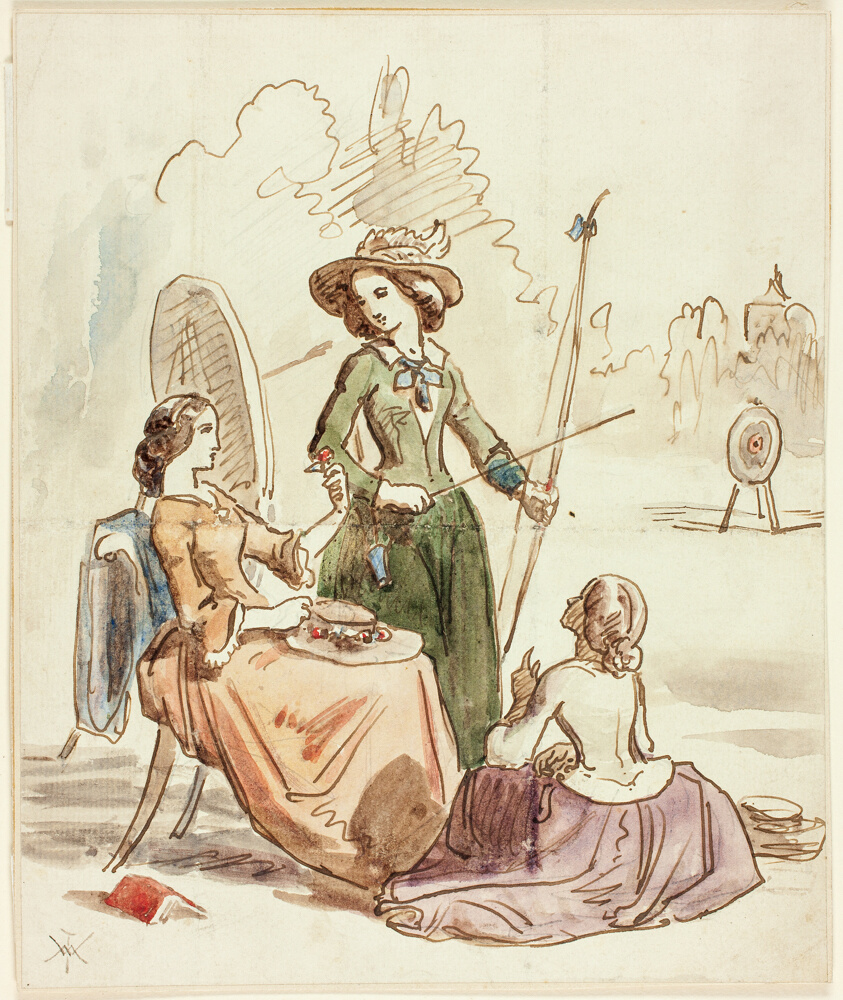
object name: Drawing and Watercolor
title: Ladies at Archery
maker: William McTaggart (Scottish, 1835-1910); or William Makepeace Thackeray (English, 1811-1863)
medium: Watercolor, and pen and brown ink, over graphite, on ivory laid paper, laid down on cream wove paper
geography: England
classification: watercolor; drawings (visual works); prints and drawing